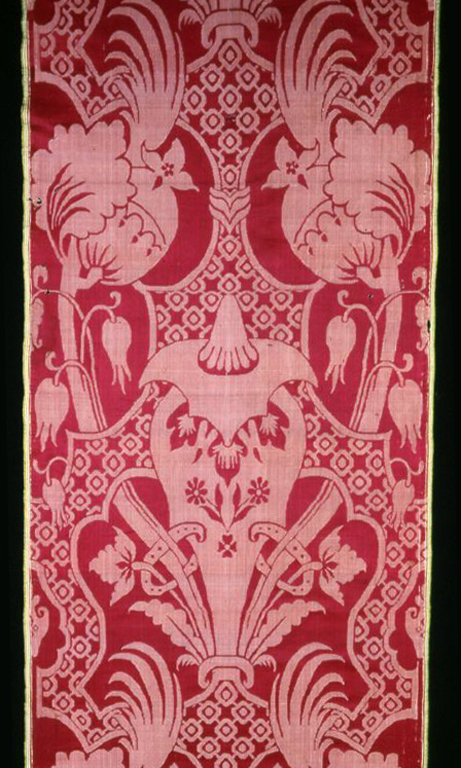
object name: Textile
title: Panel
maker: Italy, probably Piemonte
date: 1700/10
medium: Silk, 4:1 satin damask weave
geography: Italy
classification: textile; weaving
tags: fruit